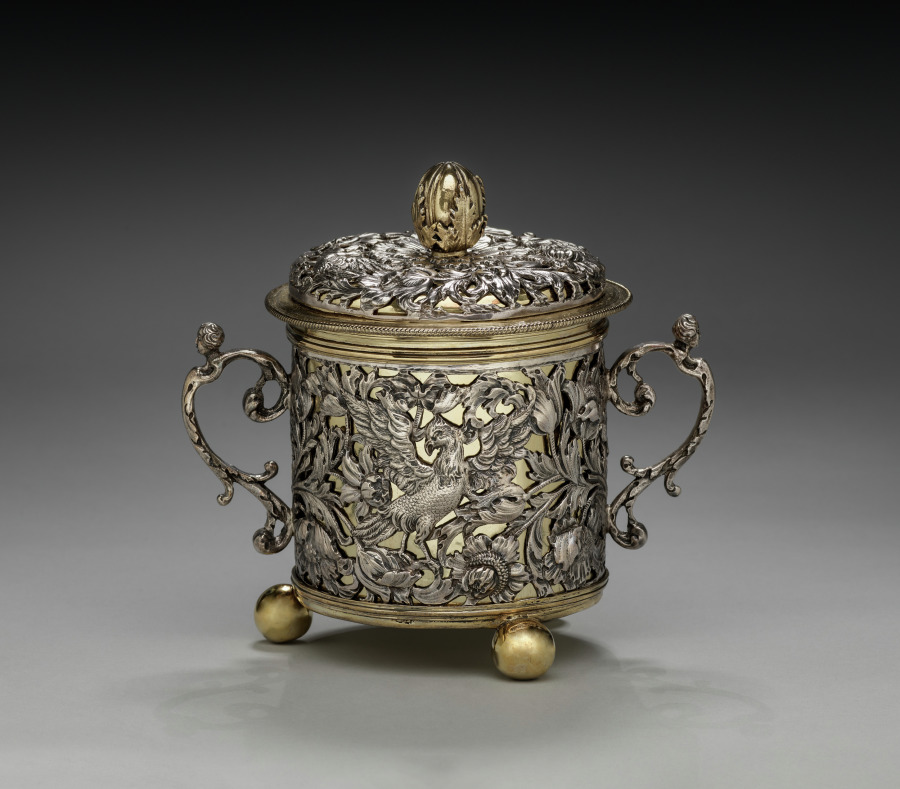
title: Two-Handled Cup and Cover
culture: England, London, 17th century (Charles II)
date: 1677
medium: silver and silver gilt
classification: Silver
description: Due to its size and ornament, this vessel may have functioned as a caudle cup, containing a mixture of ale or wine and bread, oatmeal, eggs, sugar, and spices that was given to women after childbirth to help them regain their strength. The scrolling foliage and exotic birds along the exterior of this cup were likely based on prints circulating in the 1600s. The reclining female figures capping the handles and the acanthus bud finial on the lid recall common architectural motifs.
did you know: Cups of this kind are often called sleeve cups since the ornament is incorporated into a pierced and chased hollow tube that slides over the gilded body of the cup.